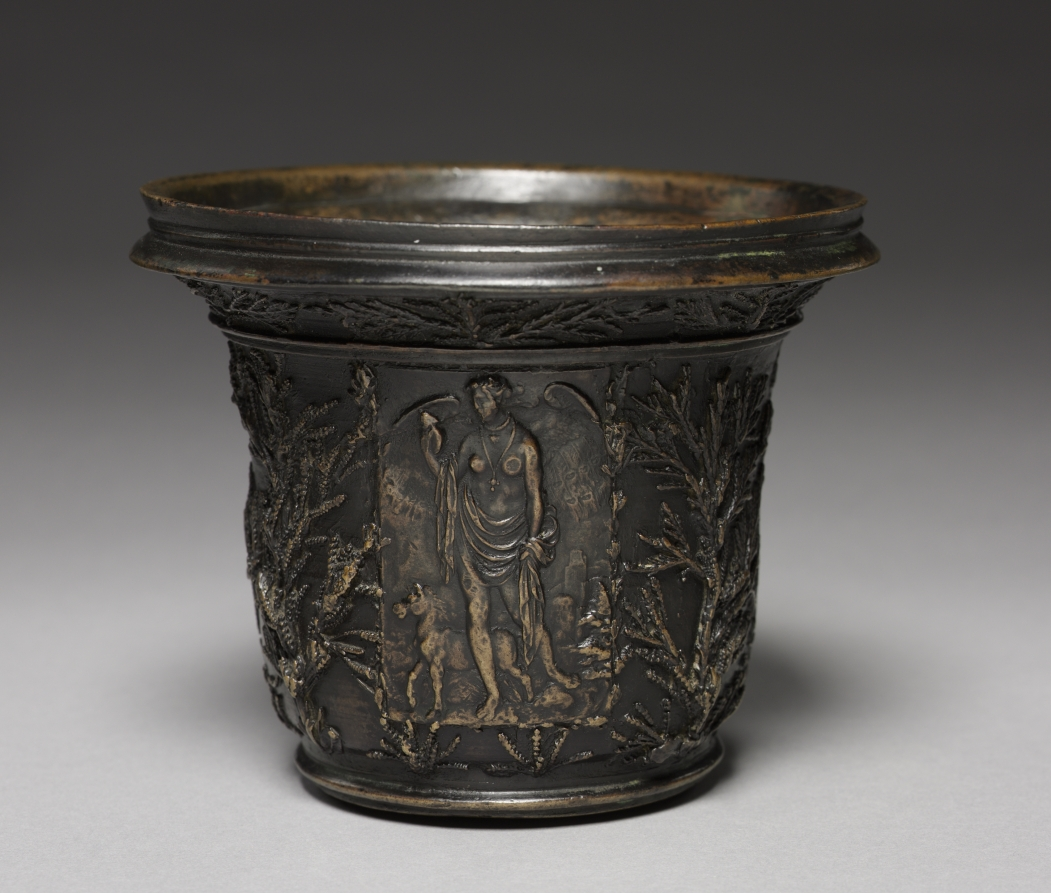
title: Mortar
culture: Germany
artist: workshop of Wenzel Jamnitzer I (German, 1508/09–1585)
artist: with plaquettes cast after models by Peter Flötner (German, 1485–1546)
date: c. 1550–1560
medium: bronze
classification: Sculpture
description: Three reliefs curiously combine faith, hope, and vanity. They were made after works by Peter Flötner (more refined plaquettes by the artist are also in the museum's collection), then incorporated into the vessel. The plants and small reptiles were cast from life, an example of the strong interest in natural history in Renaissance Nuremberg. This tradition relates closely to the French ceramics by Palissy, also in the collection, which likewise incorporate natural specimens.